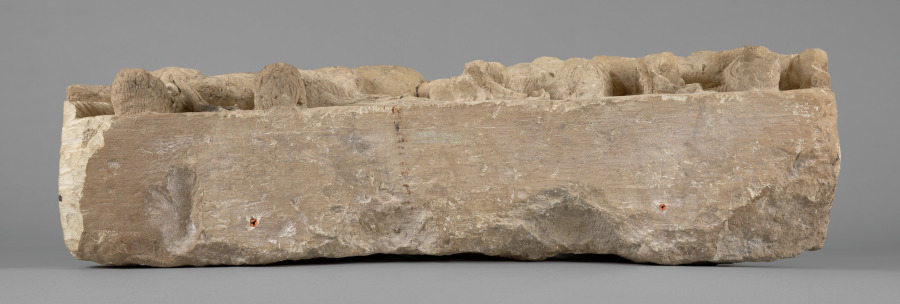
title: Procession of Nobles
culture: Syria, Palmyra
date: 100–150 CE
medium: limestone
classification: Sculpture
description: Palmyra was a key center for trade between the Roman and Parthian Empires. This unique relief has been associated with Palmyra only through stylistic comparisons; it is not known where it was found on the site. It depicts men in Parthian dress riding Arabian horses with bejeweled harness trappings ahead of riders on camels—a possible reference to the caravans that made Palmyra so wealthy. Although all of the riders are dressed and equipped as Parthians, the proportions and perspective of the scene seem to be informed by Greco-Roman conventions. It may depict a ceremonial procession.